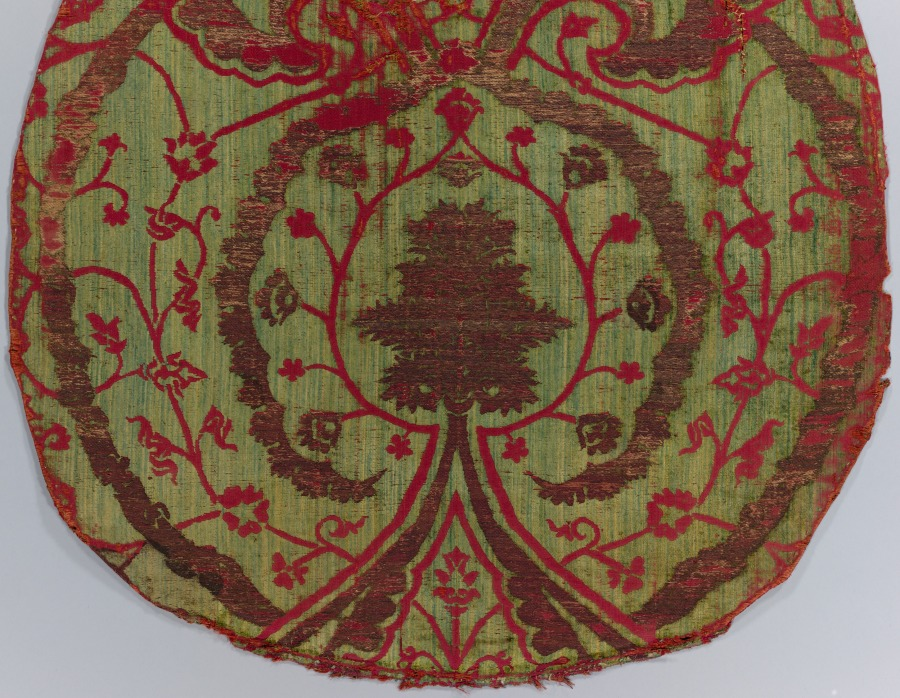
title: Chasuble Front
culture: Turkey, 16th century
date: 16th century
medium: velvet; silk and metallic thread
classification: Velvet